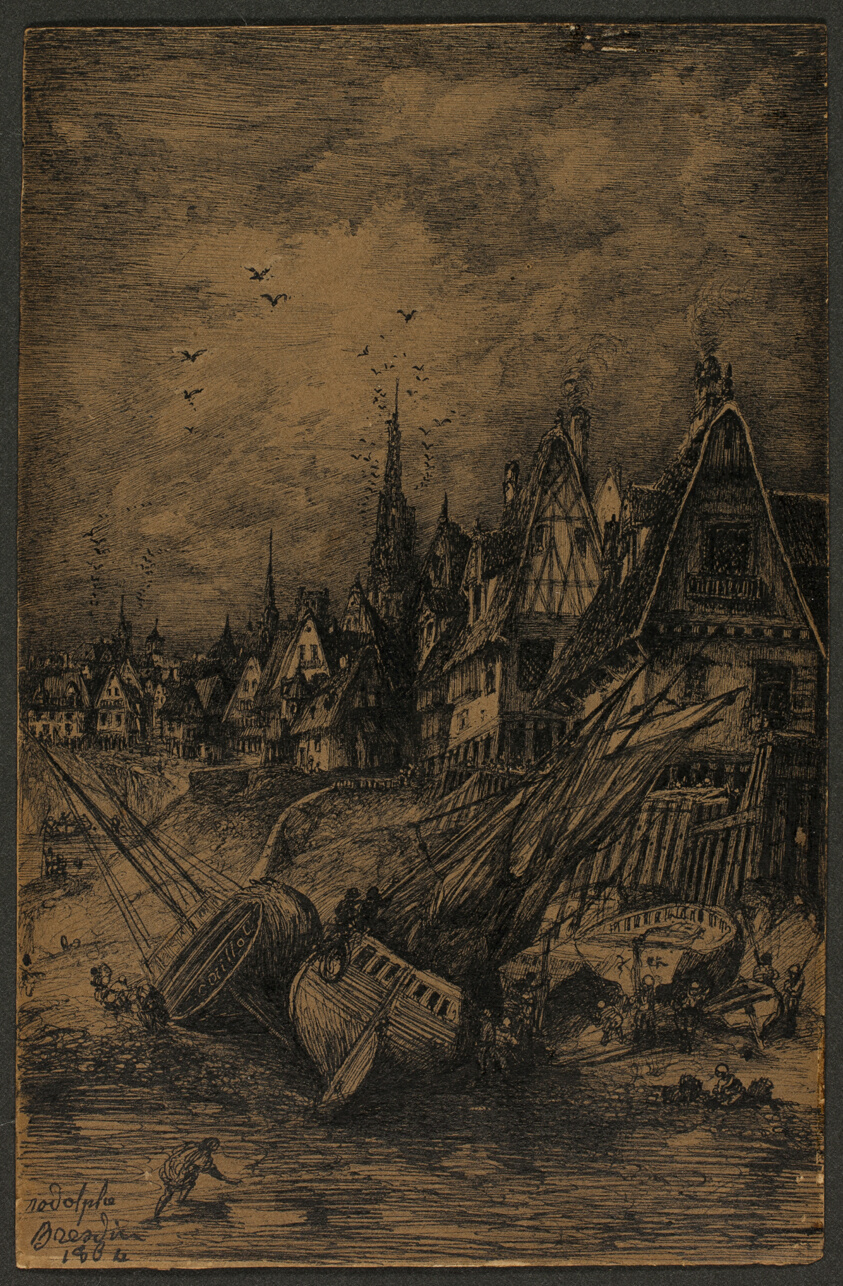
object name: Drawing and Watercolor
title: Washed Up Ships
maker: Rodolphe Bresdin (French, 1825-1885)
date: 1864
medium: Pen and black ink on brown wove card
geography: France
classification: prints and drawing; drawings (visual works)